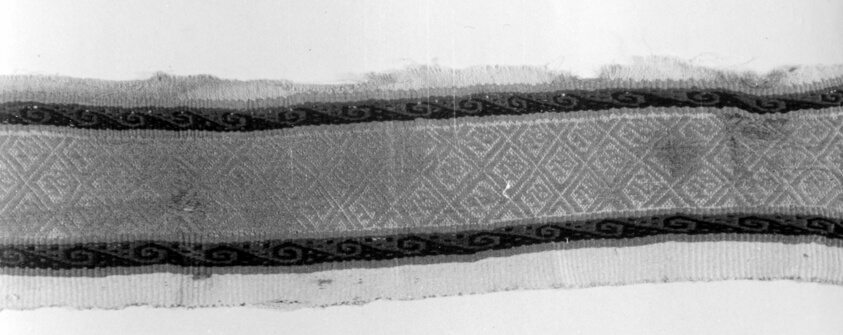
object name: Textile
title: Border fragment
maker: Possibly north coast, Peru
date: A.D. 1000/1476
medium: Fancy compound cloth. Warp: s-spun tightly twisted; s-spun, two, ply, all cotton. Weft: cotton in pairs; one s-spun and one z-spun.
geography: Peru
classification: textile; weaving